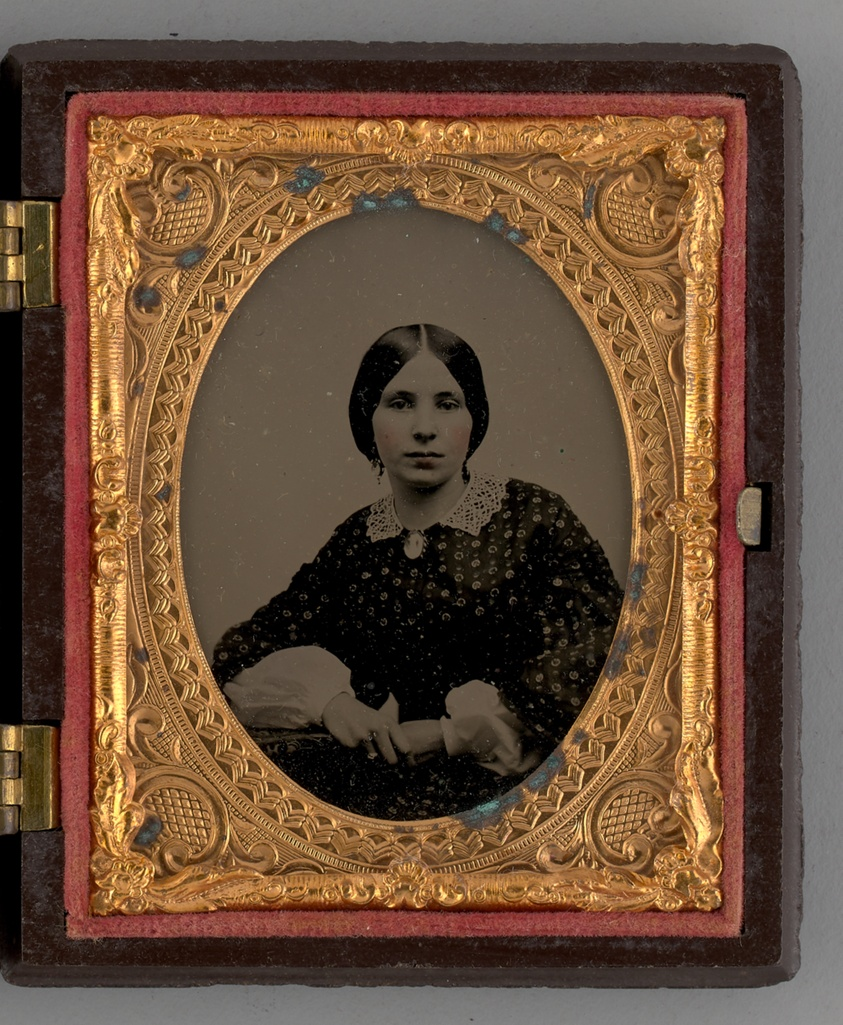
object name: Photograph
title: Untitled (Portrait of a Woman)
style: 19th century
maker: Unknown maker; American, 19th century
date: 1865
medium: Ambrotype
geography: United States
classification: portrait; photograph; photographic process; photography; portrait; ambrotype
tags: lundberg collection, portraits, portraits: female subject, portrait, woman